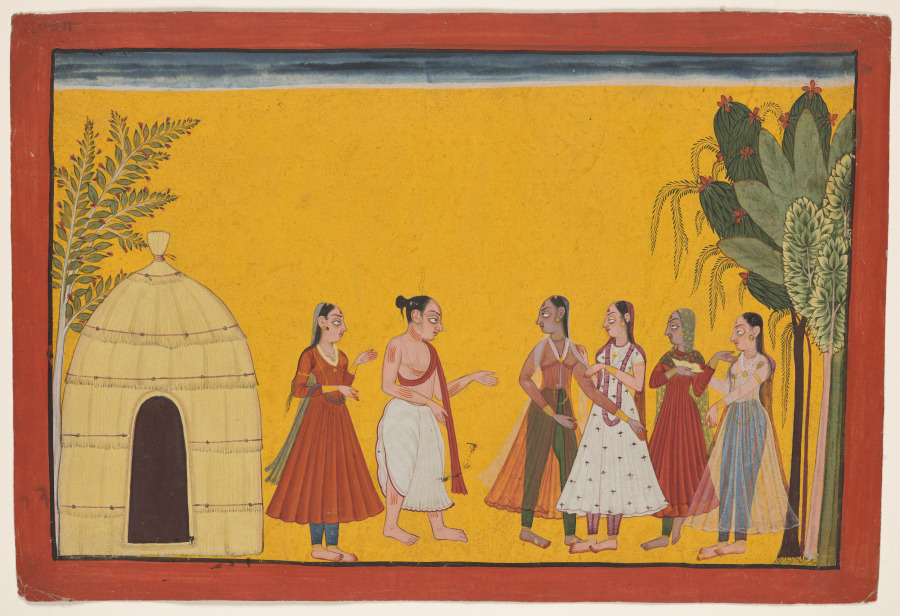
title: Rishyashringa addresses the courtesans, from the "Shangri" Ramayana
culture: Northern India, Pahari kingdoms, Himachal Pradesh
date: c. 1700–1725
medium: Gum tempera and ink on paper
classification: Painting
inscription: [[verso, upper left corner]] bāl. 70 (?)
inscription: [[recto, left margin]] 13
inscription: [[recto, upper left corner]] 13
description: A king sent the courtesans to a forest ashram to convince the ascetic boy Rishyashringa to come back with them to the palace. The king believes that Rishyashringa's presence in the palace will bring about the end of a drought. Rishyashringa had never seen a woman before and was completely bewildered by them.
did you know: This painting remains slightly unfinished, without the final touches of gold.